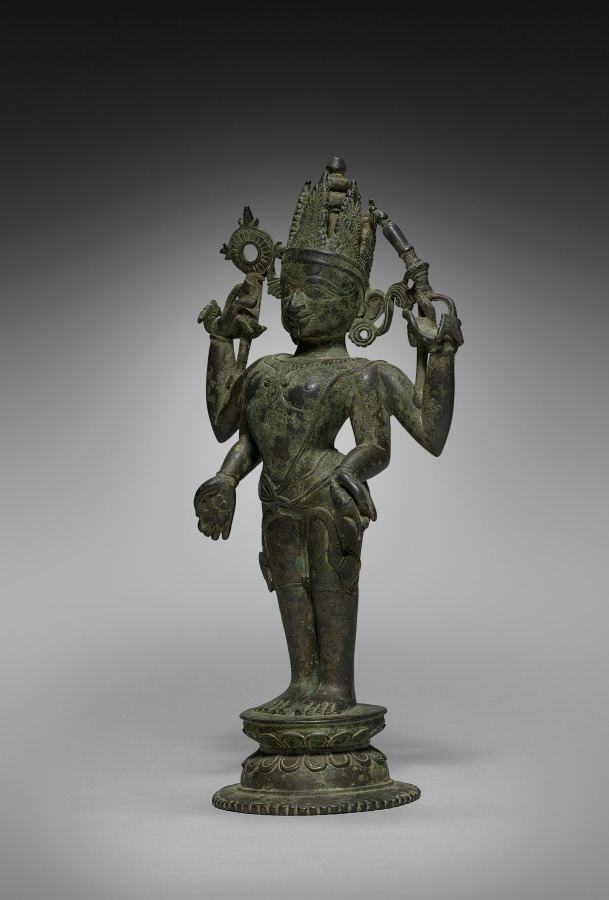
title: Vasudeva - Vishnu - Narayana as Shridhara, one of the 24 forms of Vishnu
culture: West India, 16th-17th century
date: 1500s–1600s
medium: brass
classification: Sculpture